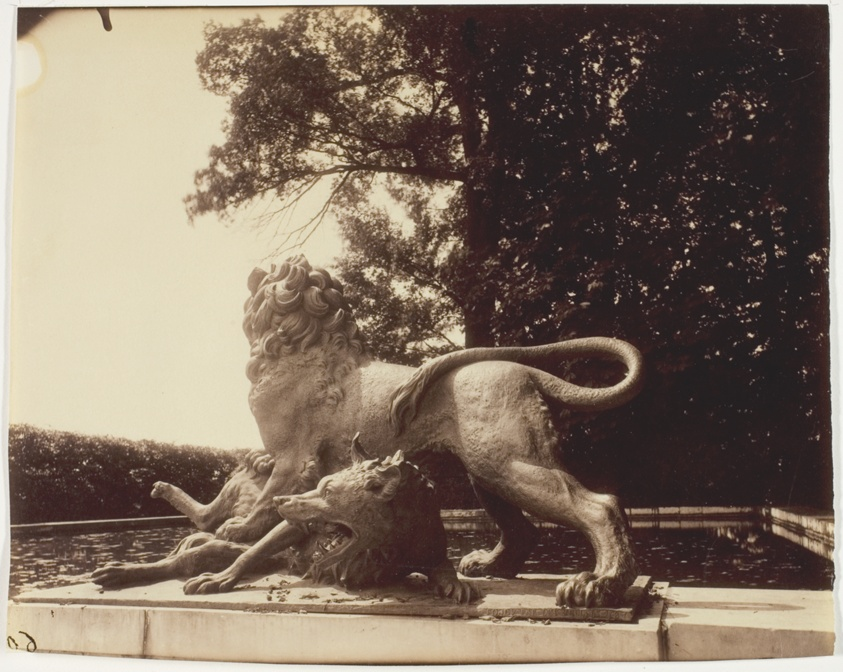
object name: Photograph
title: Versailles, Fontaine de Diane (Detail)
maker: Jean-Eugène-Auguste Atget (French, 1857–1927)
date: 1901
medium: Albumen print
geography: France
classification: albumen silver print; photographic process; photography; photograph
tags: Collected by Hugh Edwards